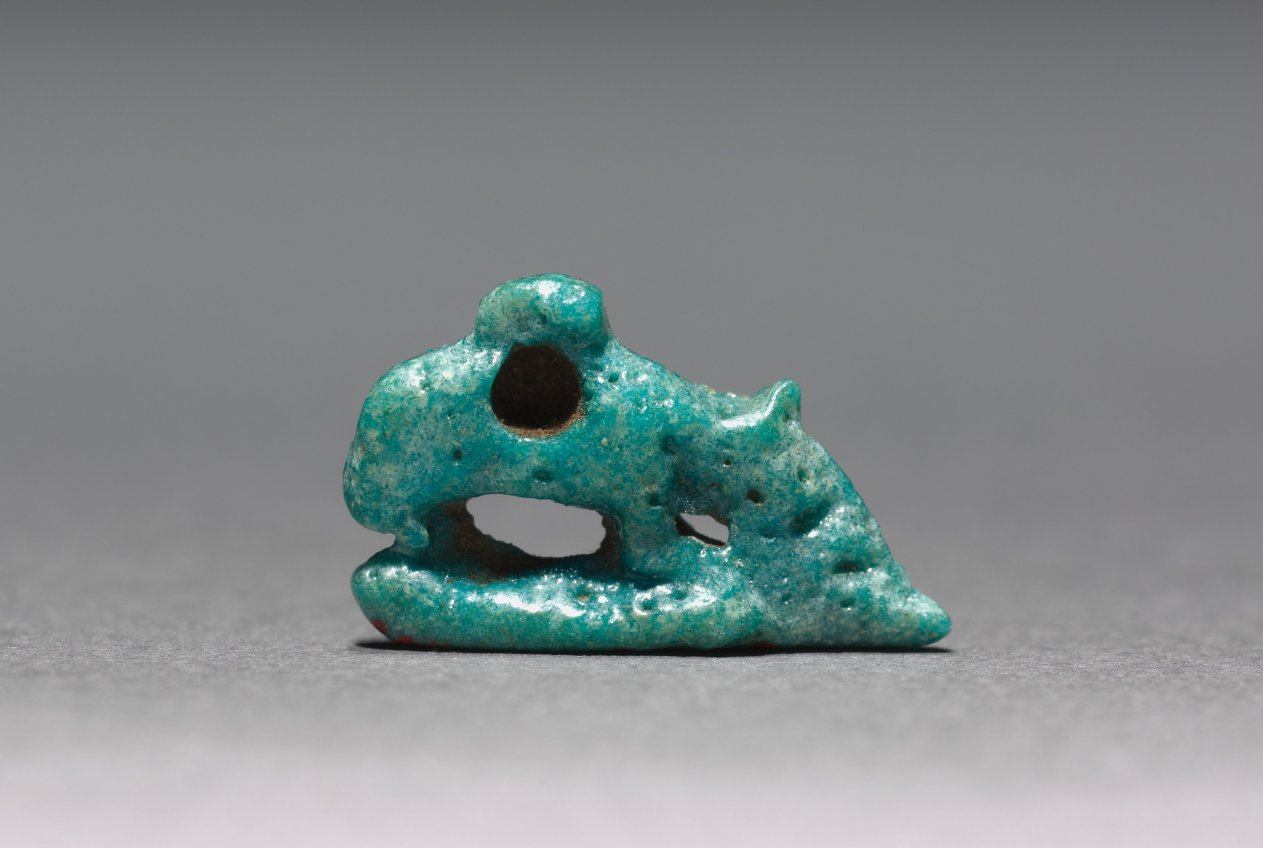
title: Amulet of a Shrew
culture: Egypt, Late period (715–332 BCE)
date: 715–332 BCE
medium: turquoise green faience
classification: Amulets